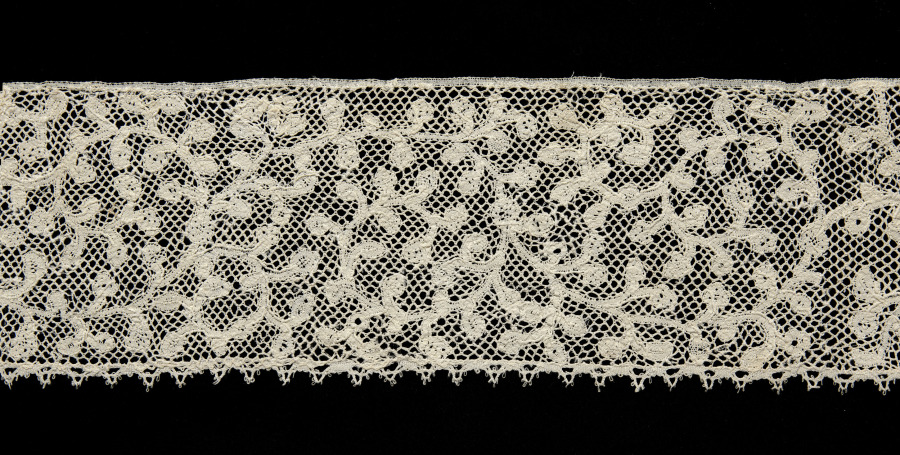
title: Lace Insertion and Edging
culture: Italy, Milan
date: 1600s–1700s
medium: Bobbin lace (Punto di Milano)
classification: Lace